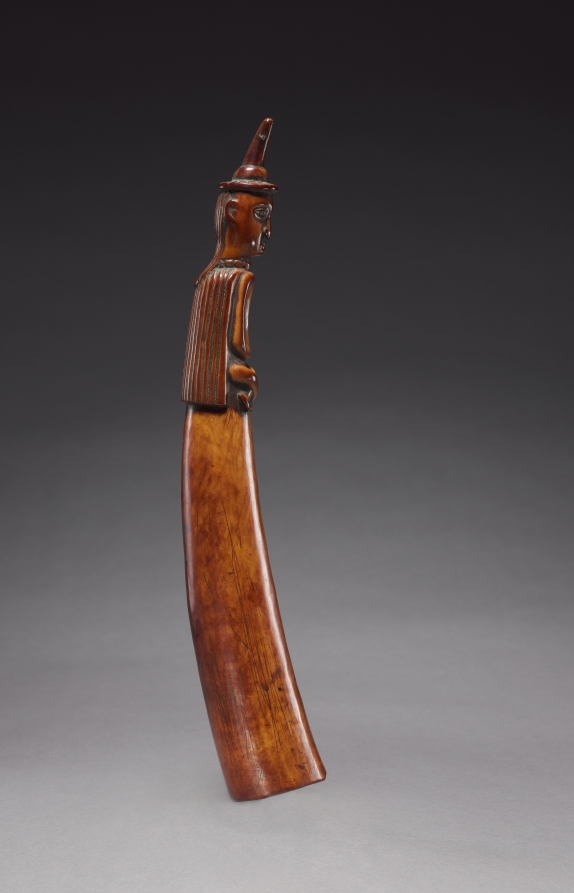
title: Oliphant (Side-Blown Trumpet)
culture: Africa, Central Africa, Democratic Republic of Congo (most likely), Cabinda, or Republic of the Congo, probably Yombe-style maker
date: late 1800s–early 1900s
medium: Ivory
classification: Musical Instrument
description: Side-blown trumpets were used on various occasions, and ivory examples seem to have been reserved for more solemn circumstances, such as funerals. As the mouthpiece is located on the inner curve, the person who played this instrument held it horizontally. A seated male Yombe ruler wearing a shell necklace and a European-style cloak and hat is carved on top. His blended dress shows how Yombe people (a Kongo sub-group) selectively adopted elements of foreign dress to wear with their own fashions.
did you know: Kongo Kingdom rulers sent ornately carved large side-blown trumpets to Europe as diplomatic gifts during the sixteenth century.